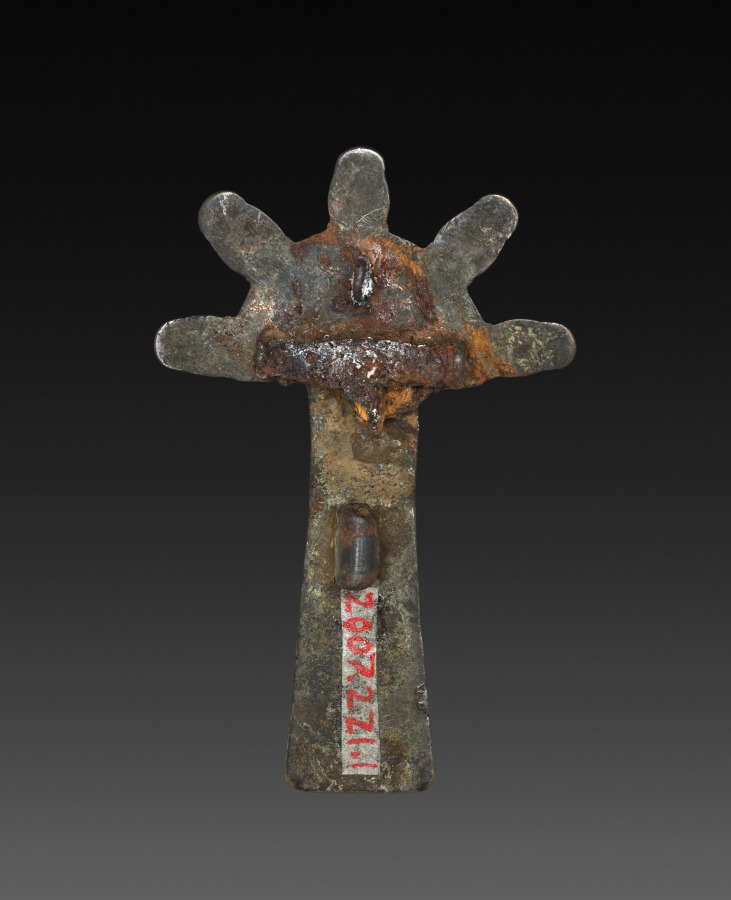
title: Bow Fibula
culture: Alemannic, 6th century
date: 500–550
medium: silver gilt and niello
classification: Jewelry